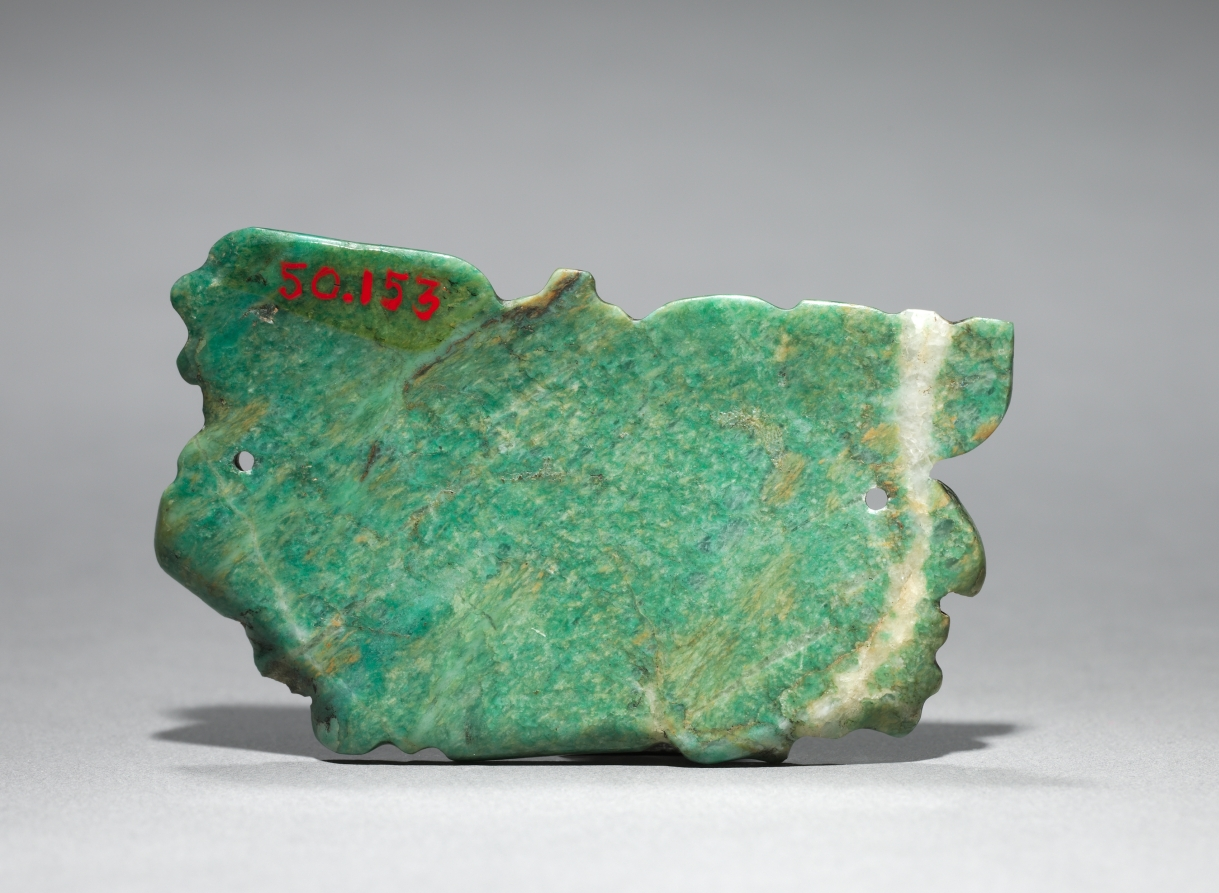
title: Ornament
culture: Mexico or Central America, Maya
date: 250–900 CE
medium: greenstone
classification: Stone